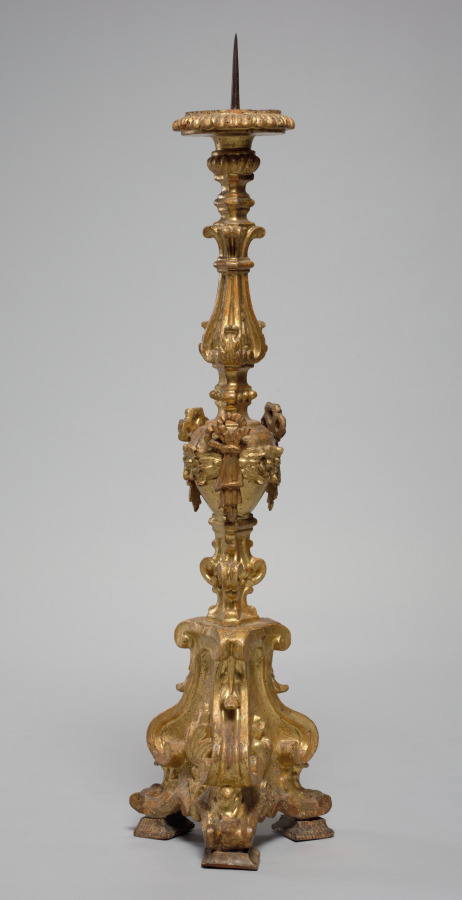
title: Candleholder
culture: Italy, mid-late 17th century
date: mid-late 1600s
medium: gilded wood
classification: Furniture and woodwork